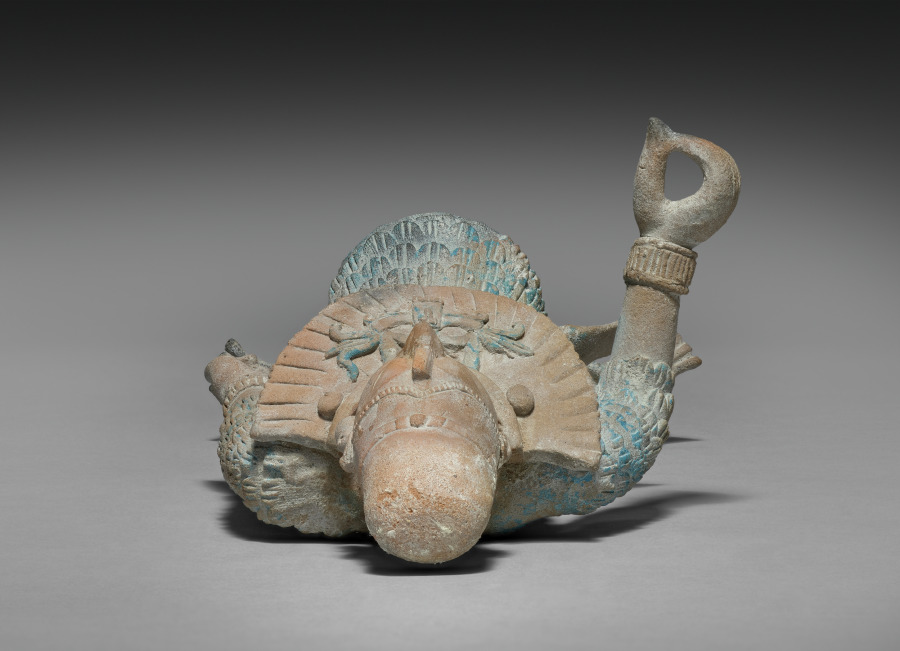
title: Warrior Figurine with Removable Headdress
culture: Mexico, Yucatán, Jaina Island region, Campeche, Maya style (250-900)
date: 600–900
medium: earthenware with pigment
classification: Sculpture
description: The major offerings placed in the Maya graves of Jaina Island were ceramic figurines, some of Mesoamerica's finest, that depict deities and humans in a variety of roles. This warrior, his headdress removable, once probably held weapons and wears either quilted cotton armor or the feathered uniform of a military order. We don't know why such figures are often pot-bellied.